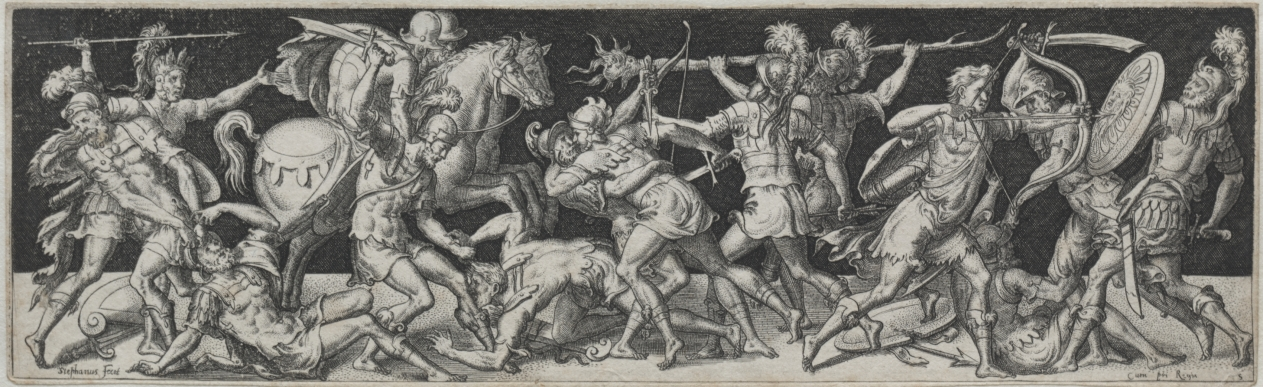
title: Combats and Triumphs No. 10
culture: France, 16th century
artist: Etienne Delaune (French, 1518/19-c. 1583)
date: c. 1550–72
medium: engraving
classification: Print